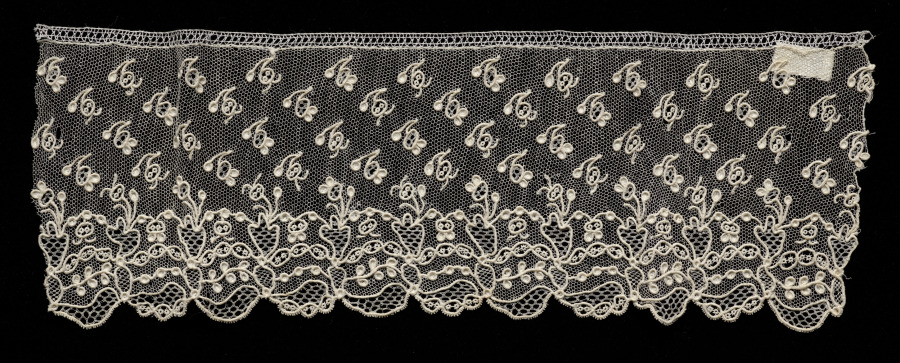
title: Lace Edging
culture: France, Alençon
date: 1715–74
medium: Linen: needle lace (Point d'Alençon)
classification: Lace